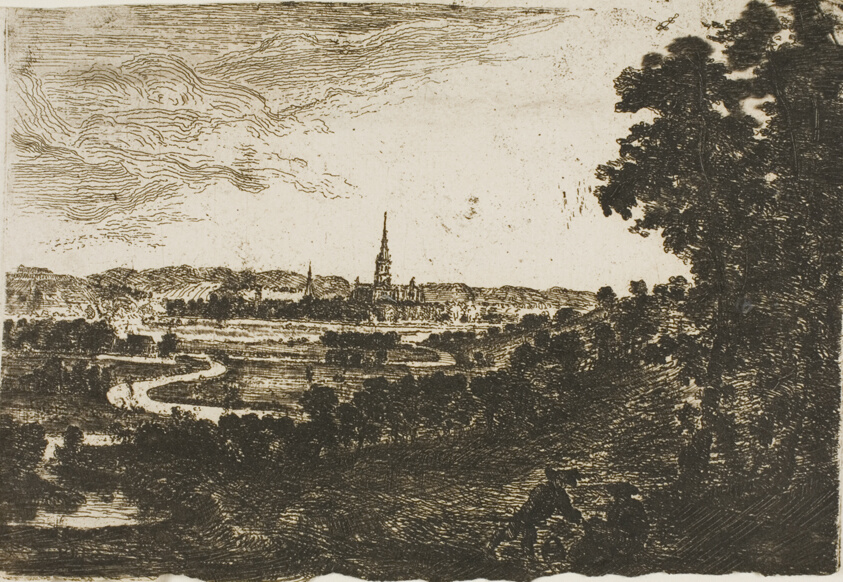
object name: Print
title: Salisbury from Wilton Park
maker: John Clerk of Eldin (Scottish, 1728-1812)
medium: Etching on paper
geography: Scotland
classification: etching; print; prints and drawing